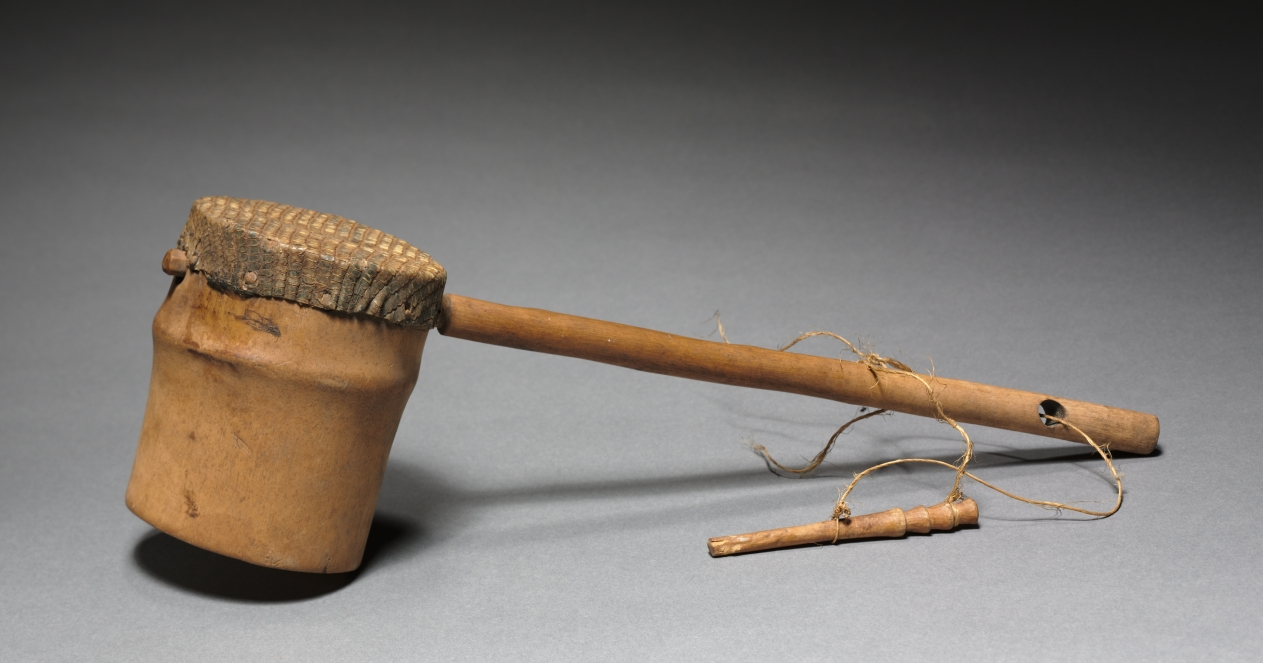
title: Spike fiddle (endingidi or iningidi)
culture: Eastern Africa, Uganda or Rwanda-Burundi, unknown maker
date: 1900s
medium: Wood, snakeskin, and plant fiber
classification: Musical Instrument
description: The endingidi is a single-stringed chordophone musical instrument. Scholars believe it was introduced into the Kingdom of Buganda (in present-day Uganda) between 1904 and 1907. From Uganda, it was later introduced to present-day Rwanda, where it is called iningidi and played by Hutu musicians. Horsehair stretched from the end of the handle and over the reptile-skin–covered tube sound box, and attached to the handle with the wooden tuning peg. A deeply curved bow, now missing, would have allowed a male musician to play the instrument as he held it vertically. Still played today, the music of the endingidi is often heard at weddings or played by royal Bugandan court musicians.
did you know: A photograph taken around 1929 shows that this instrument once had a tassle of long, black animal hair attached to the handle. This tassel beautified the instrument and gave it a dignified "clothed" presence when played at the Bugandan court.